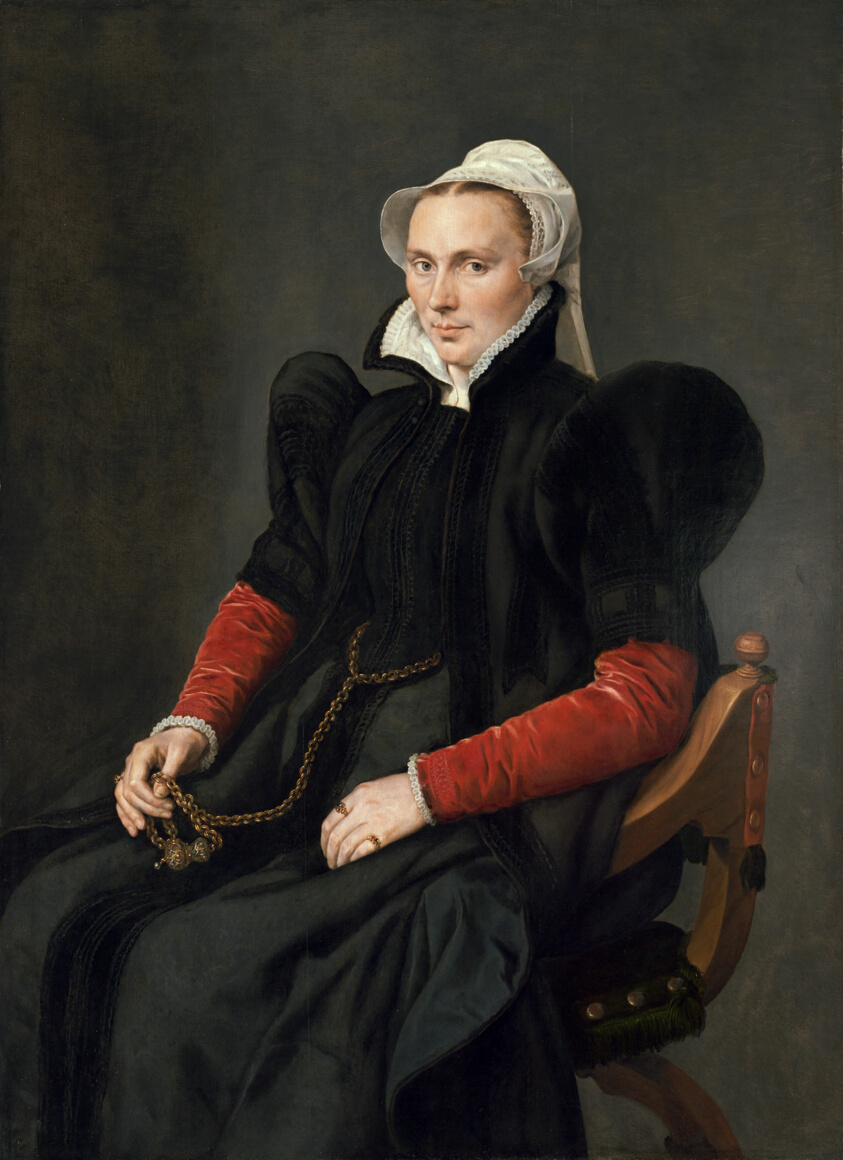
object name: Painting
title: Portrait of a Seated Woman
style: 16th Century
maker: Antonis Mor (Netherlandish, 1516/21-1575/77)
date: c. 1565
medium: Oil on panel, mounted on aluminum sheet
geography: Netherlands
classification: oil on panel; paint; portrait; painting; european painting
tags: portraits: female subject, chair, dresses, portrait, woman, Century of Progress, world's fairs, Chicago World's Fairs